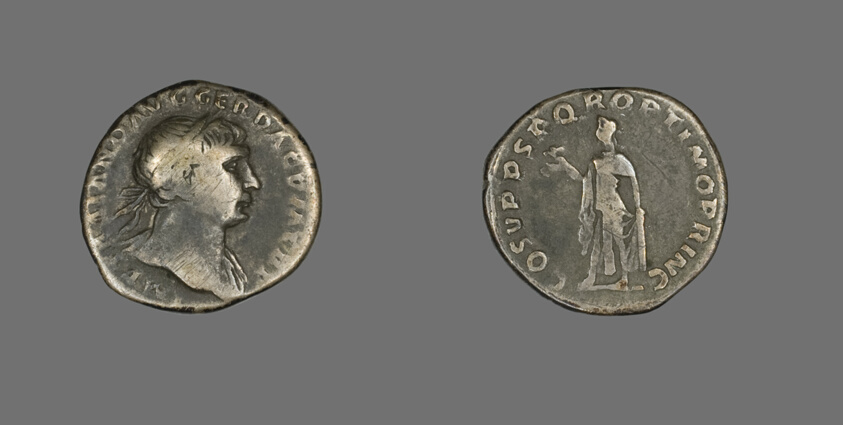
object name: Coin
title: Denarius (Coin) Portraying Emperor Trajan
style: roman (ancient, style or period)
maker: Roman, minted in Rome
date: 103-111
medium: Silver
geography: Roman Empire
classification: coin; ancient art